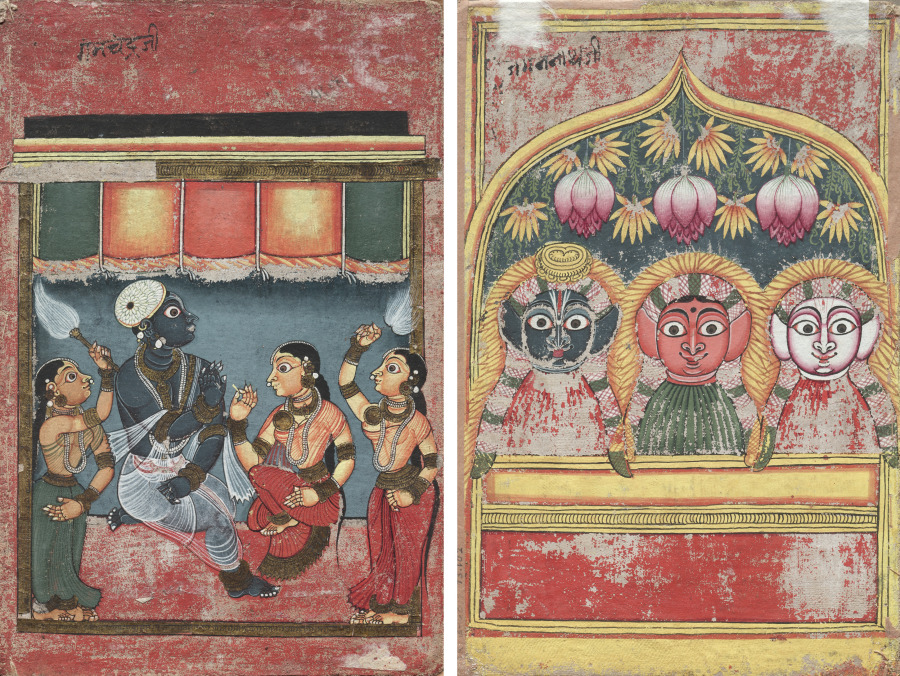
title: Krishna with Radha and Two Attendants (recto); Jagannath, Subhadra and Balarama in an Arch (verso)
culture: Southern India, Andhra Pradesh, possibly Tirupati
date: 1700s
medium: color on cloth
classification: Painting